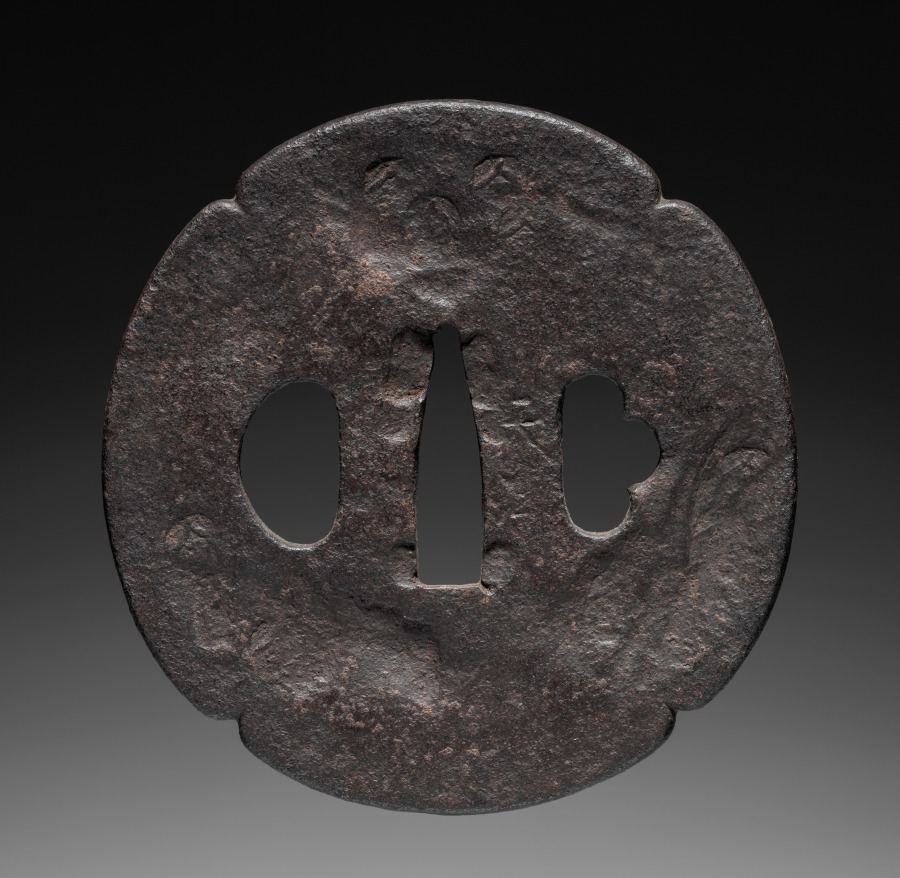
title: Sword Guard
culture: Japan, Edo period (1615–1868)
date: early 1800s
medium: iron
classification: Arms and Armor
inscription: Signature: Tempo